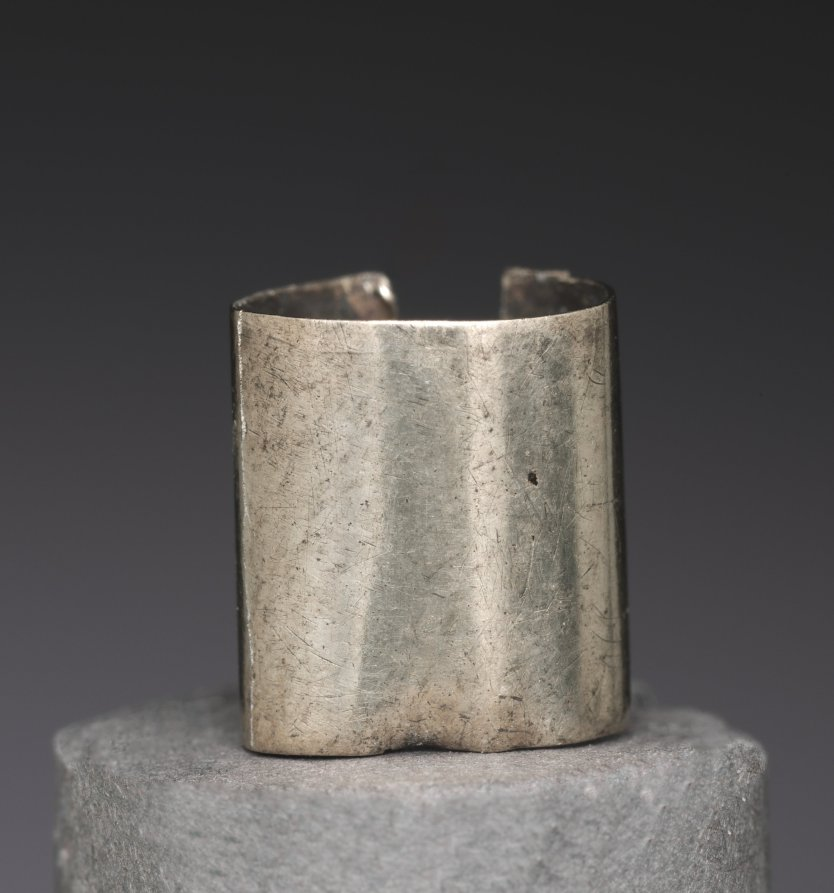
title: Element of Wig Decoration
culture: Egypt, Middle Kingdom (2040–1648 BCE), Dynasty 12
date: 1980–1801 BCE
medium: silver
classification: Jewelry